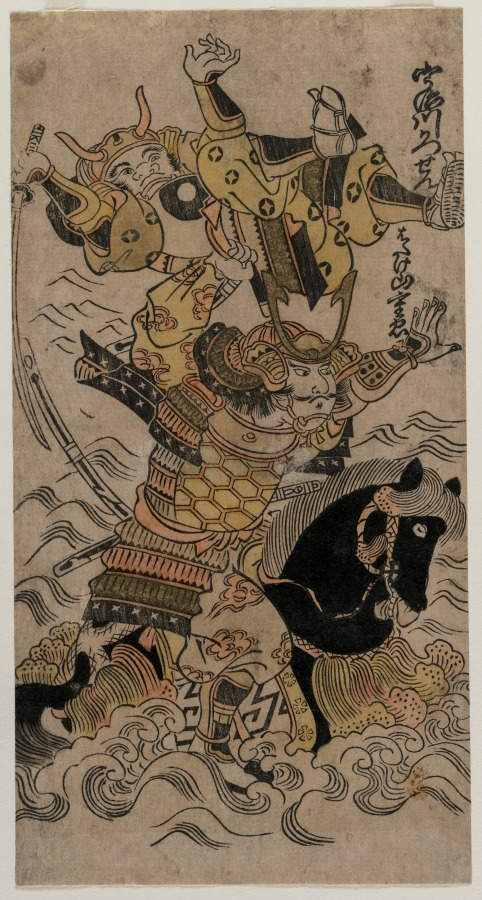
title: The Battle of the Uji River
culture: Japan, Edo period (1615–1868)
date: 1720–30s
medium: color woodblock print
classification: Print